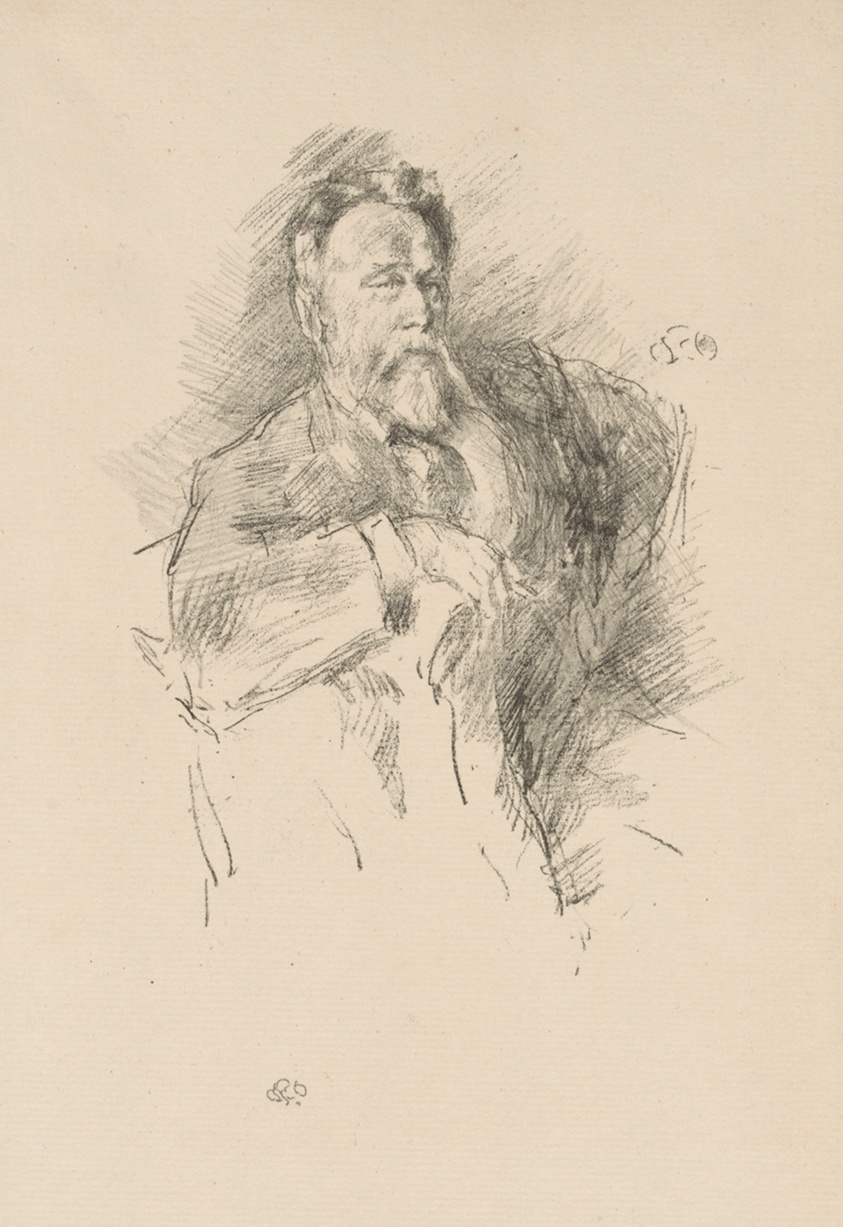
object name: Print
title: Sketch of William E. Henley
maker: James McNeill Whistler (American, 1834-1903)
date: 1896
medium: Transfer lithograph in black with stumping, on ivory laid paper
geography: United States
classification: transfer lithograph; lithograph; print; prints and drawing; paper